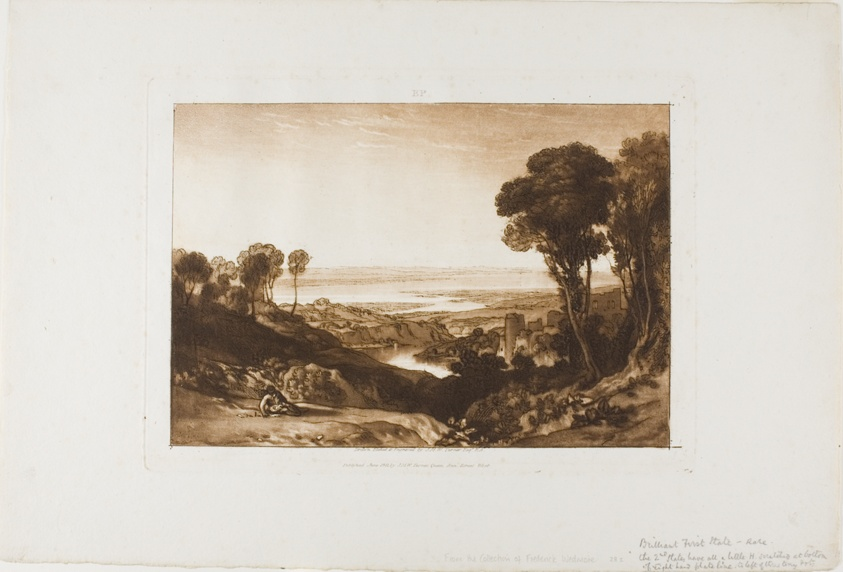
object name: Print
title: Junction of the Severn and Wye, plate 28 from Liber Studiorum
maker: Joseph Mallord William Turner (English, 1775-1851)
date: Published June 1811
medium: Etching and aquatint with roulette on ivory wove paper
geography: England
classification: etching; print; prints and drawing